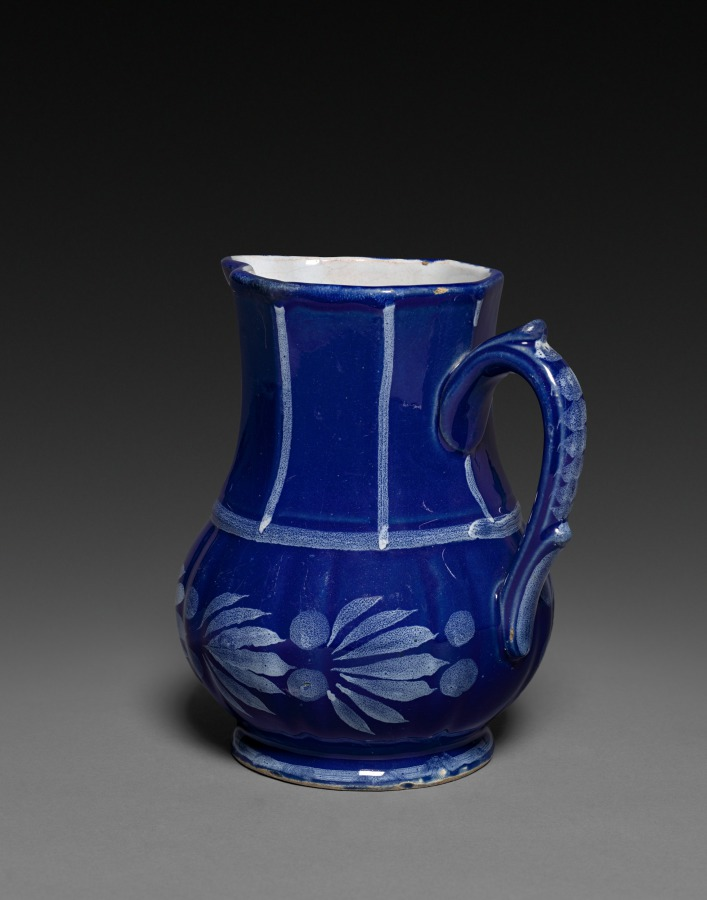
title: Jug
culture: France, 18th century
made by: possibly by Saint Omer Factory (French)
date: late 1700s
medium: faience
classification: Ceramic